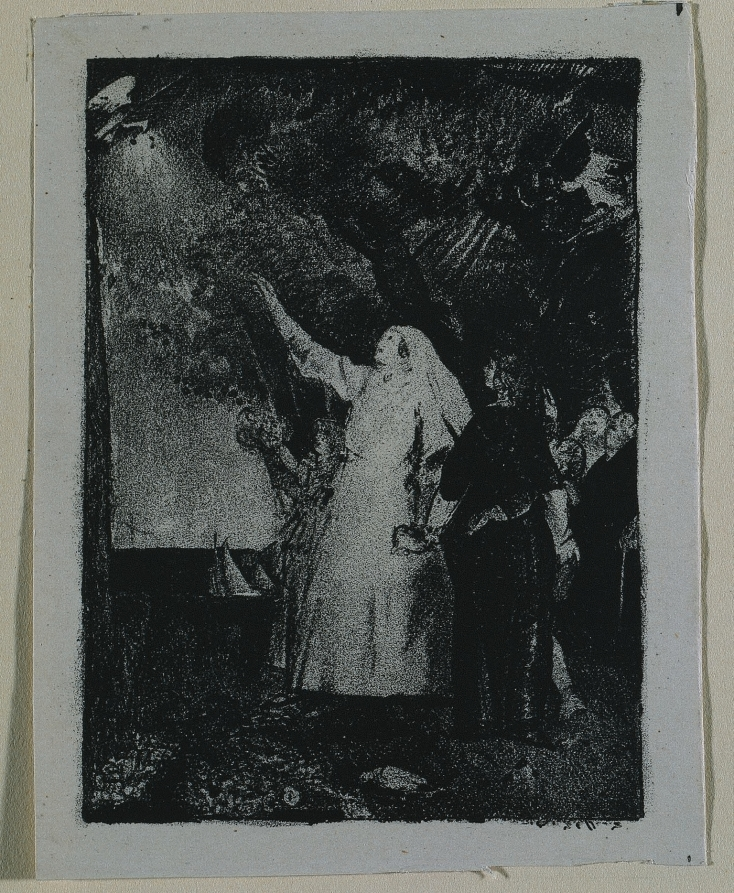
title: Hail to Peace, Christmas 1918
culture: America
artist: George Bellows (American, 1882–1925)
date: 1919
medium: lithograph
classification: Print